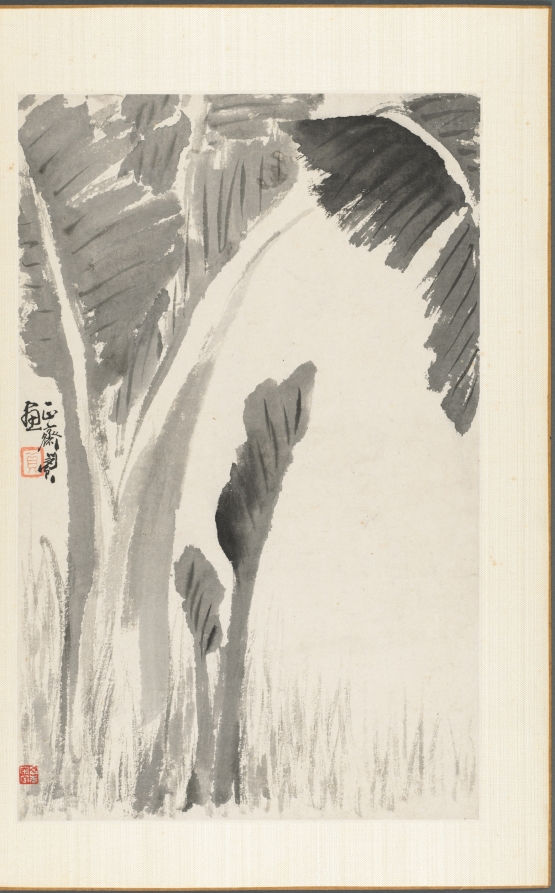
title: Banana Plants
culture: China, Qing dynasty (1644-1911)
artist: Min Zhen (Chinese, 1730–after 1788)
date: 1788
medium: album leaf, ink on paper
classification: Painting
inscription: Six seals appearing on the leaves: Min Zhen 閔貞; Zheng zhai 正齋; Qingqiao 青橋; Zhen 貞; Liao tang 蓼塘; Min Zhen zhi yin 閔貞之印。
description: Min Zhen was trained by Tang Yin (1682–1756), a writer, playwright, and superintendent of the imperial porcelain workshops in Jingdezhen. The connection to him may have enabled Min to stay in Beijing for a decade from around 1773. It is not clear whether he ever resided in Yangzhou, but his style is in many instances reminiscent of that of Yangzhou artist Huang Shen. This album was painted for his friend Dailili Shanren in exchange for a scholar’s stone. The paintings demonstrate the artist’s versatility and mature style in the last years of his life. While two paintings are rendered in unconventional compositions seen from above (Cat and Butterfly CMA 1985.71.5) and below (Banana Plant CMA 1985.71.11), they have a humorous touch. The banana plant stands for the world of literati but can also allude to Buddhism.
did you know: Min Zhen was orphaned at age 12 and developed an eccentric personality,